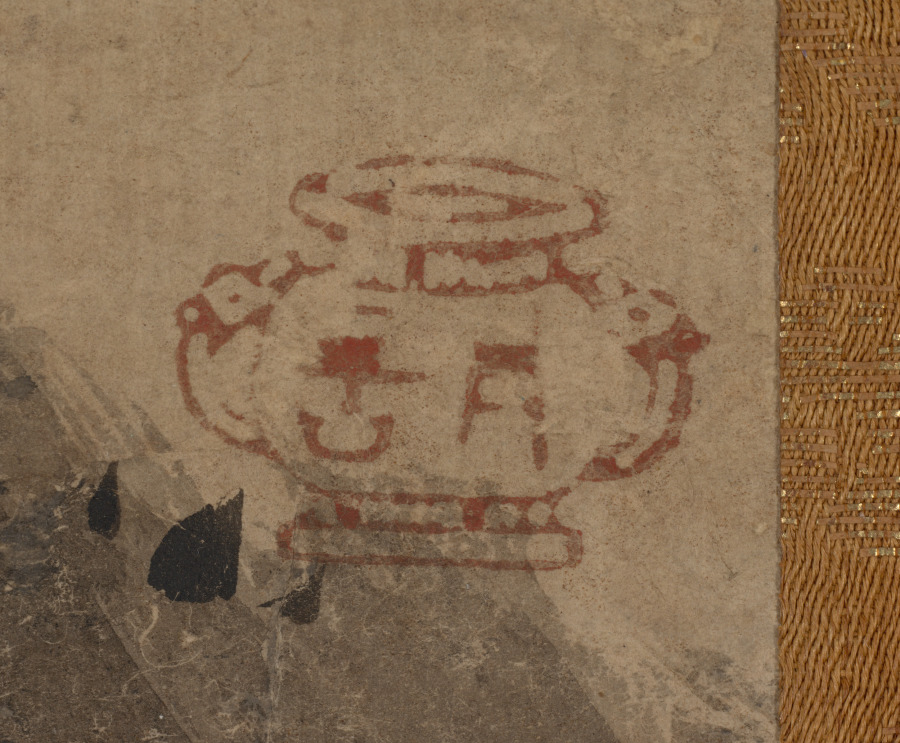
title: Landscape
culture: Japan, Edo period (1615–1868)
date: early 1600s to mid-1800s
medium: hanging scroll; ink on paper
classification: Painting